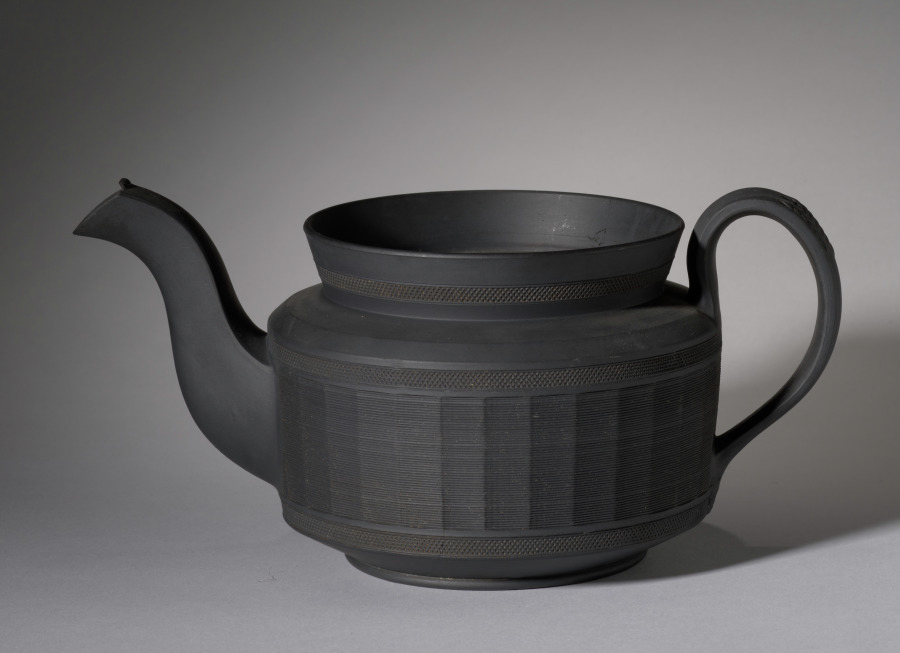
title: Teapot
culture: England, Staffordshire, 19th century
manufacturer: Davenport Pottery and Porcelain Factory (British)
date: 1800s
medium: black basalt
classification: Ceramic